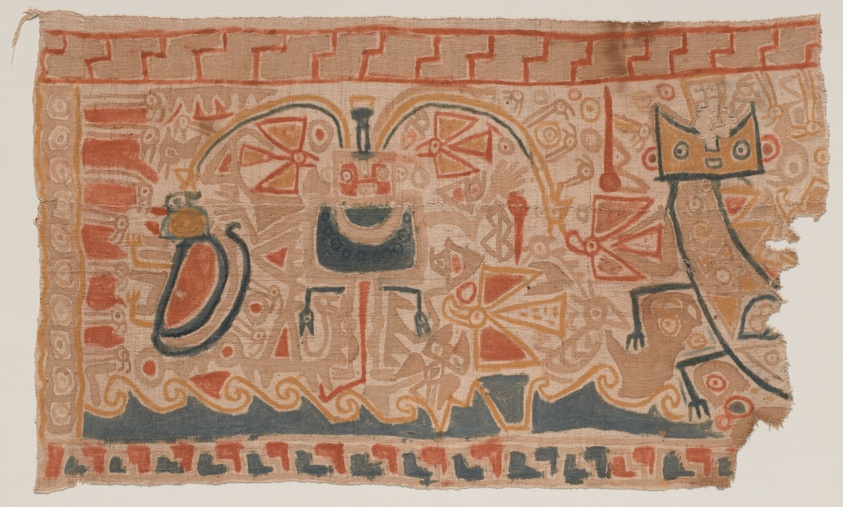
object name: Textile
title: Painted Textile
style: chimú capac, Arts of the Americas, andean, peruvian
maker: Probably Chimu Capac, Supe Valley, north coast, Peru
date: c. 1000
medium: Cotton, plain weave; painted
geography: Peruvian North Coast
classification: textile; cotton; art of the americas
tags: figures (representations), feline, birds, waves, serpents